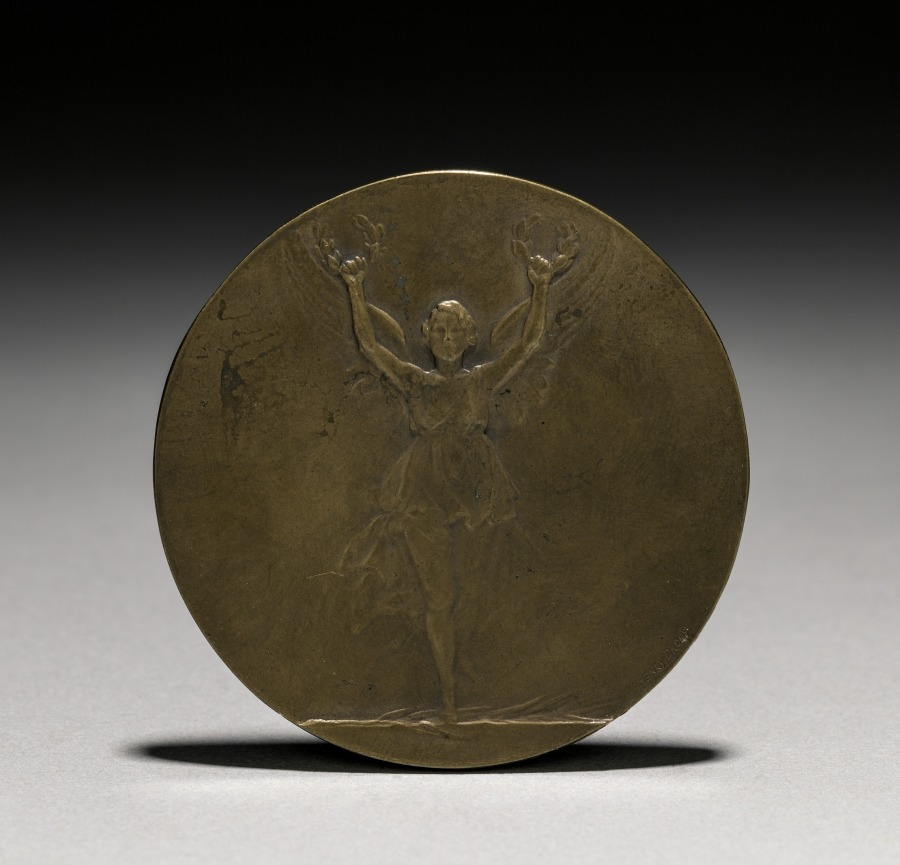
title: Medal of French Republic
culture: France, Early 20th century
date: before 1972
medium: bronze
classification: Metalwork